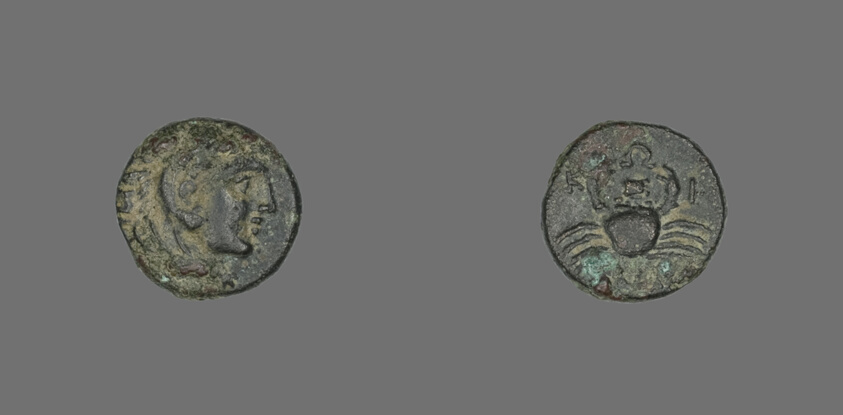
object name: Coin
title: Coin Depicting the Hero Herakles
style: greek, ancient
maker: Greek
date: late 4th century BCE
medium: Bronze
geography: Ancient Greece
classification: coin; ancient art